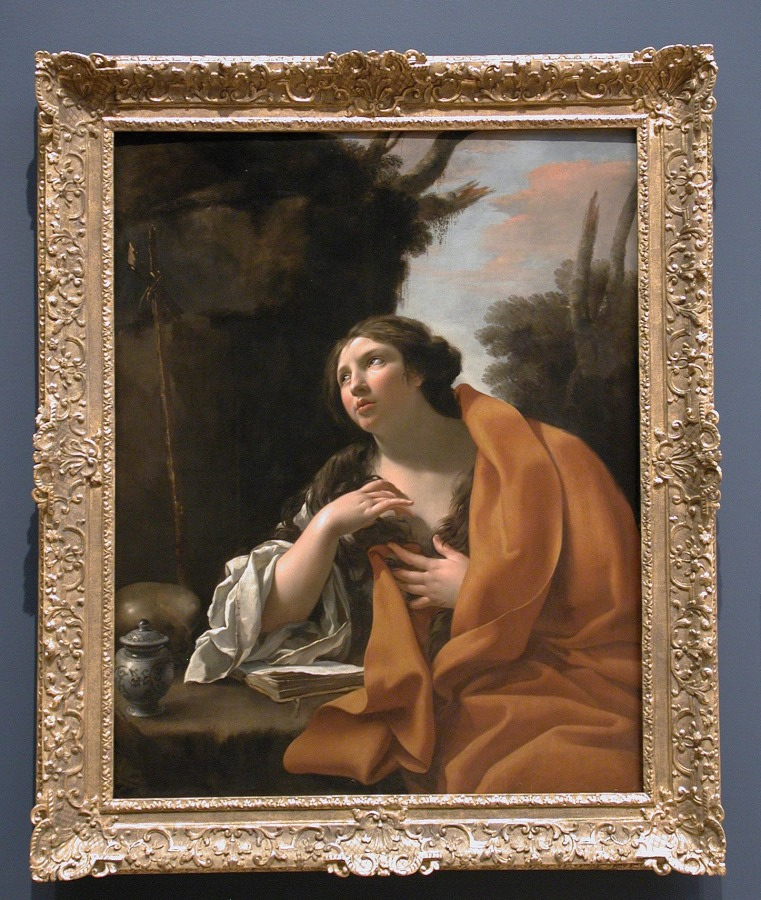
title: Saint Mary Magdalen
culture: France, 17th century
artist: Simon Vouet (French, 1590–1649)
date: c. 1630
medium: oil on panel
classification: Painting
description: Simon Vouet worked in Rome for several years before he was summoned back to France in 1627 to serve as court painter to King Louis XIII. This painting, executed soon after his return, reveals how skillfully Vouet adapted his Italian experiences to local tastes: the focus on a single monumental figure, positioned close to the picture plane, reflects the influence of Caravaggio, but the vivid pastel colors accord with the French preference for a brighter palette. Representations of the penitent Magdalene as a hermit—expressing Christian devotion but also sensuality—were exceedingly popular in the 1600s.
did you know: The skull beside Mary symbolizes the fleeting nature of life and ultimate worthlessness of material possessions.